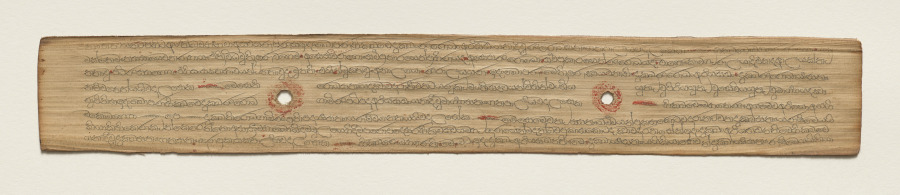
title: Leaf from a Buddhist Manuscript (verso)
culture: Sri Lanka, Singhalese, Late 17th century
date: c. 1700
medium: fiber paper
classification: Manuscript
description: Palm leaf material is still used for manuscripts in Sri Lanka. The palm leaves are prepared first by boiling them, drying them in the sun, and then rubbing them with oils. Scribes then use a metal stylus to incise the text. Then charcoal powder is wiped across the pages, filling in only the inscribed lines.